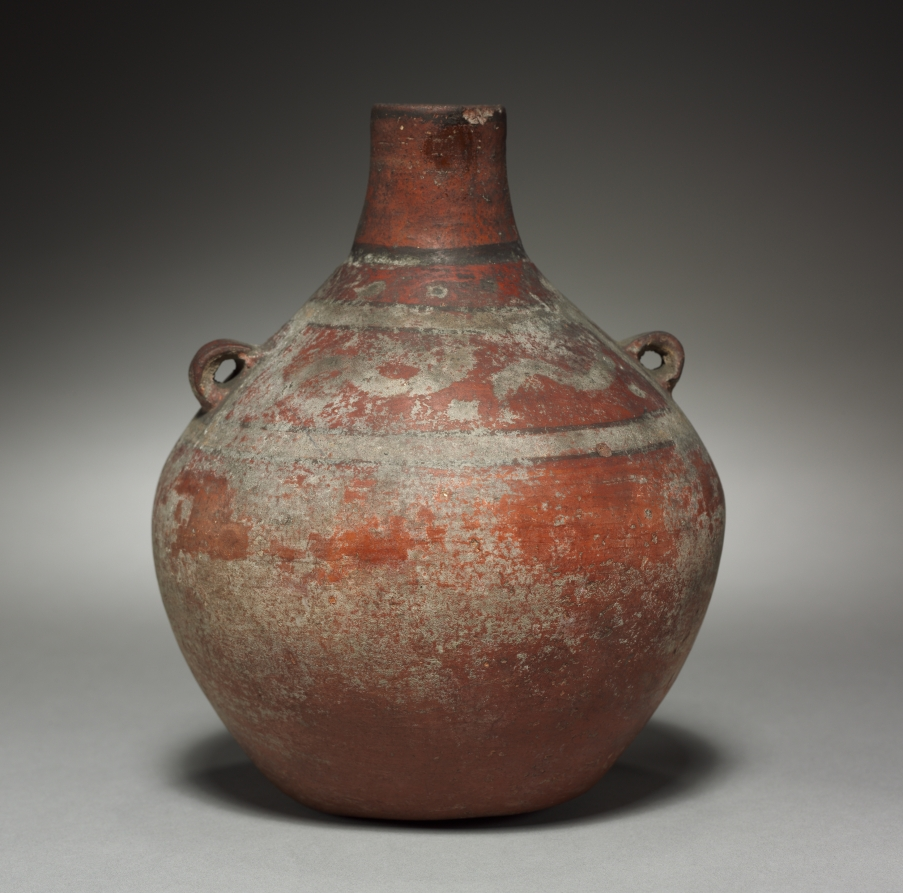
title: Bottle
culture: Peru, Pachacamac, Tiwanaku style, 400-1000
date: 400–1000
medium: pottery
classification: Ceramic